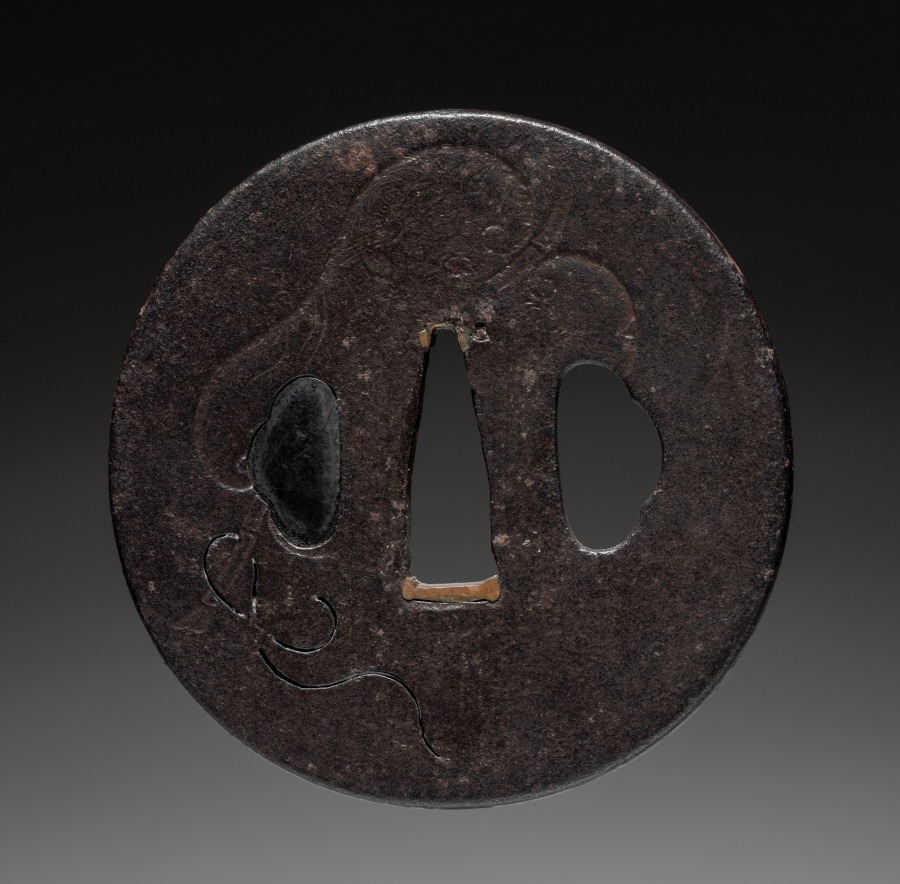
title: Sword Guard (Tsuba) with Fan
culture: Japan, possibly Edo period (1615-1868)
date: c. 1615–1868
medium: iron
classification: Arms and Armor